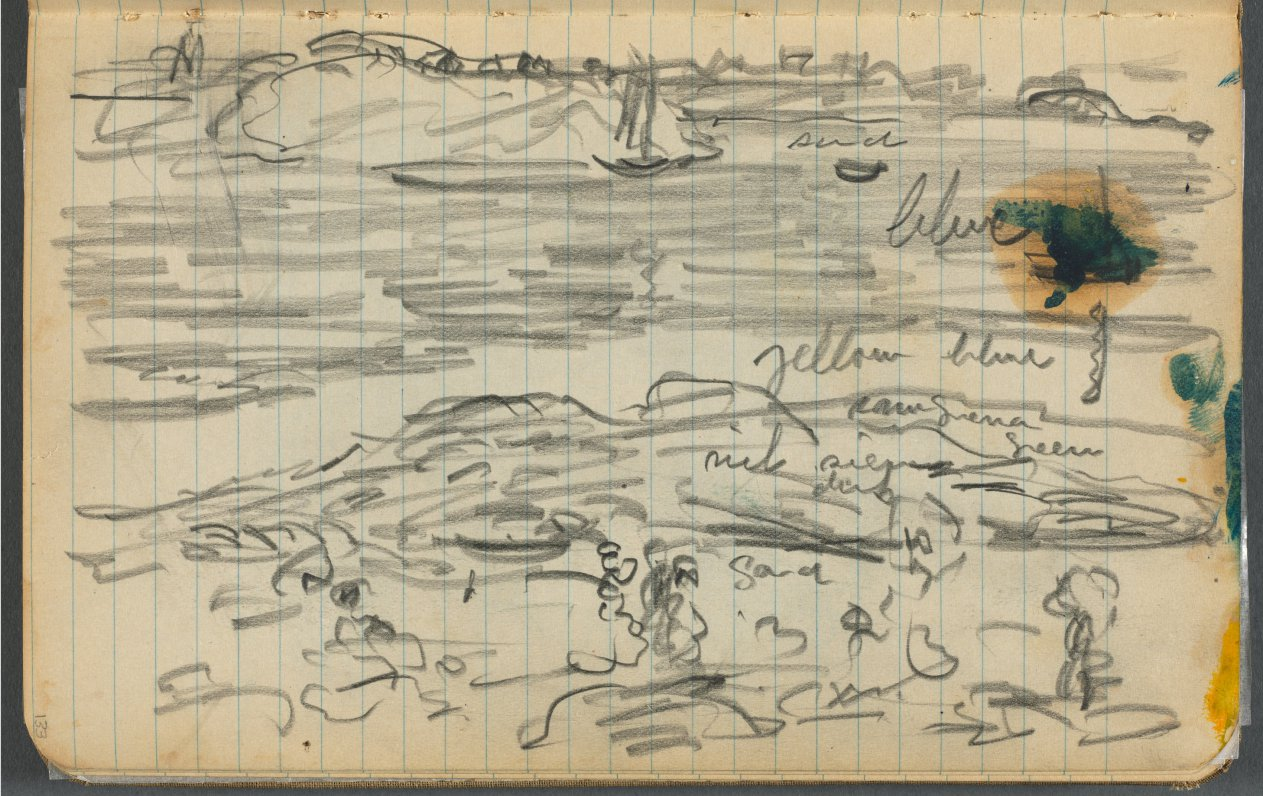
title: Sketchbook, page 133: Marine View with color notations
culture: America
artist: Maurice Prendergast (American, born Newfoundland [now Canada], 1858–1924)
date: 1905–10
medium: graphite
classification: Bound Volume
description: This sketchbook contains 69 pages of drawings, a diary largely devoted to the state of the artist's health, and a three-page discourse on the nature of genius and ideas.